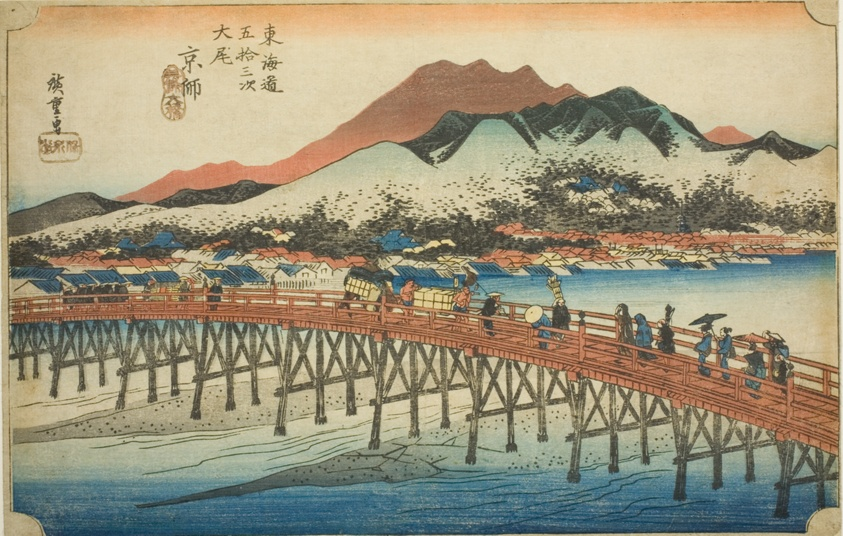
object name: Print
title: Kyoto: The Great Bridge at Sanjo (Keishi, Sanjo ohashi), from the series "Fifty-three Stations of the Tokaido (Tokaido gojusan tsugi no uchi)," also known as the Hoeido Tokaido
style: Japanese (culture or style)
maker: Utagawa Hiroshige 歌川 広重; Japanese, 1797-1858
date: c. 1833/34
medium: Color woodblock print; oban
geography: Japan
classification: woodblock print; print; asian art